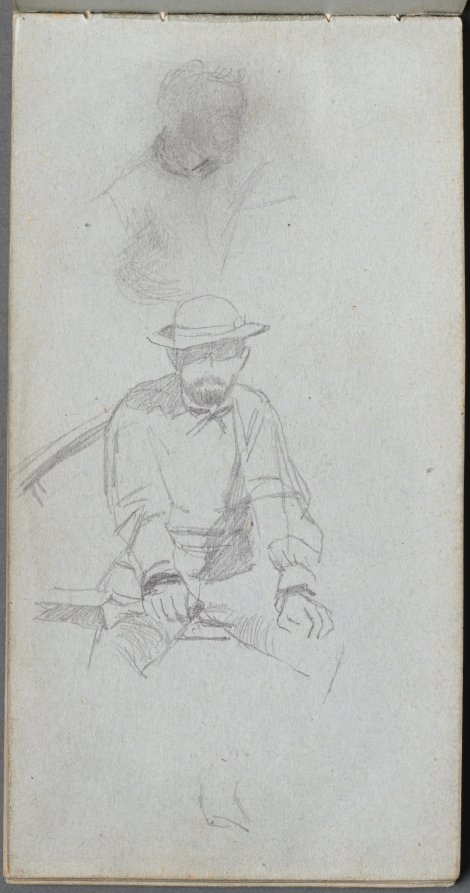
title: Sketchbook, page 30: Seated Male Figure and Figure in Profile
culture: France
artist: Ernest Meissonier (French, 1815–1891)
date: c. 1860s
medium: graphite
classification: Bound Volume